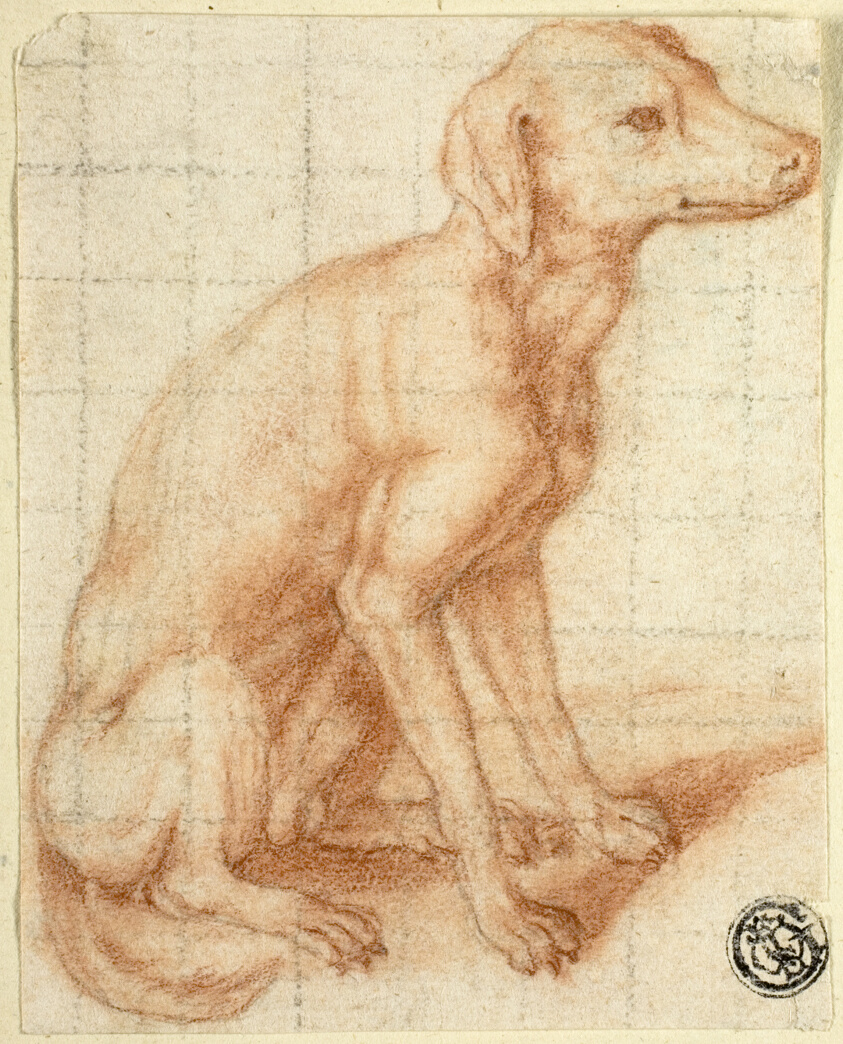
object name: Drawing and Watercolor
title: Retriever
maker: Attributed to Dirk Valkenburg (Dutch, 1675-1721); or after Albrecht Dürer (German, 1471-1528)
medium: Red chalk with stumping, squared in black chalk, on ivory laid paper, tipped onto cream wove paper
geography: Holland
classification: chalk; drawings (visual works); prints and drawing